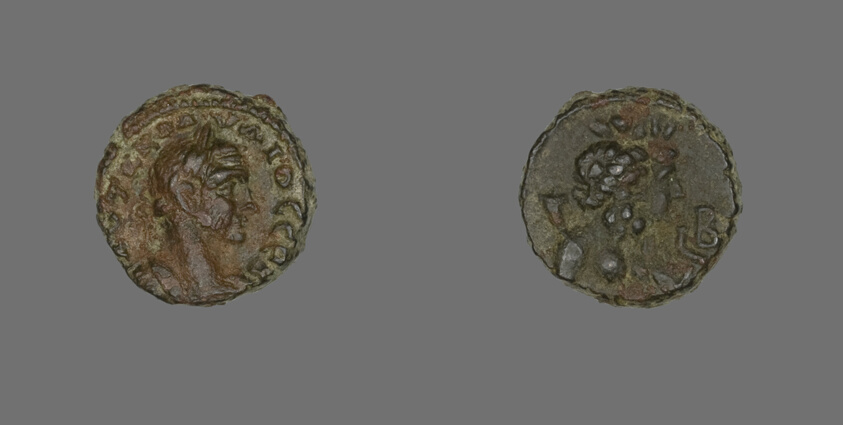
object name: Coin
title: Tetradrachm (Coin) Portraying Emperor Claudius II Gothicus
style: roman period (egyptian), greco-roman (egyptian)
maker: Roman; minted in Alexandria, Egypt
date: 268-269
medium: Billon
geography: Egypt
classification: coin; ancient art